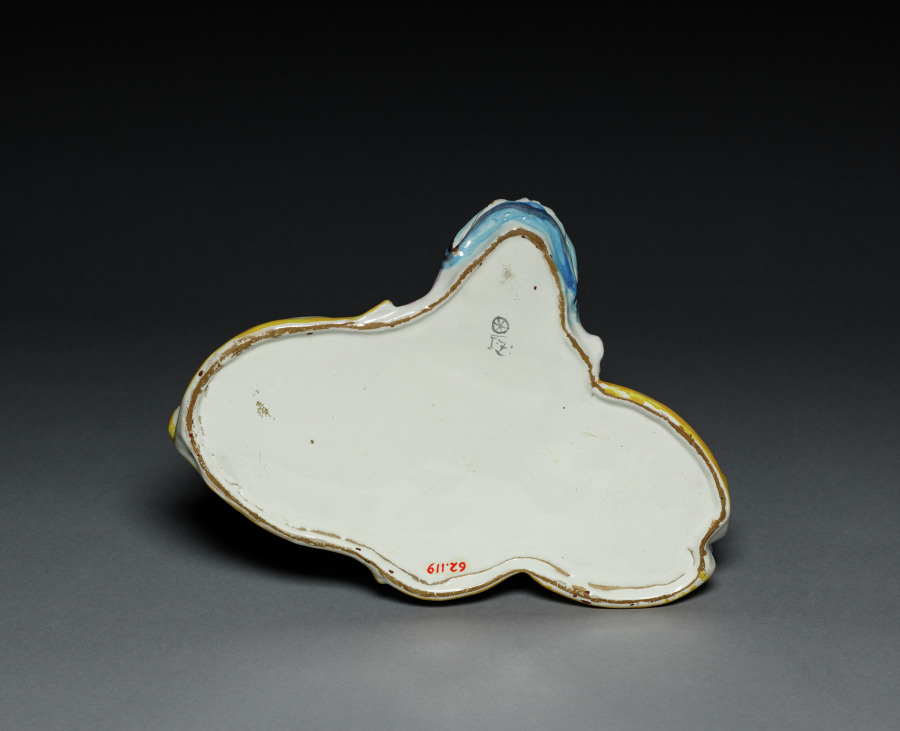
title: Center Piece with Dolphin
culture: Germany, Höchst, 18th century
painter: Johannes Zeschinger (German, 1723-)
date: 1750–1775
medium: faience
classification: Ceramic